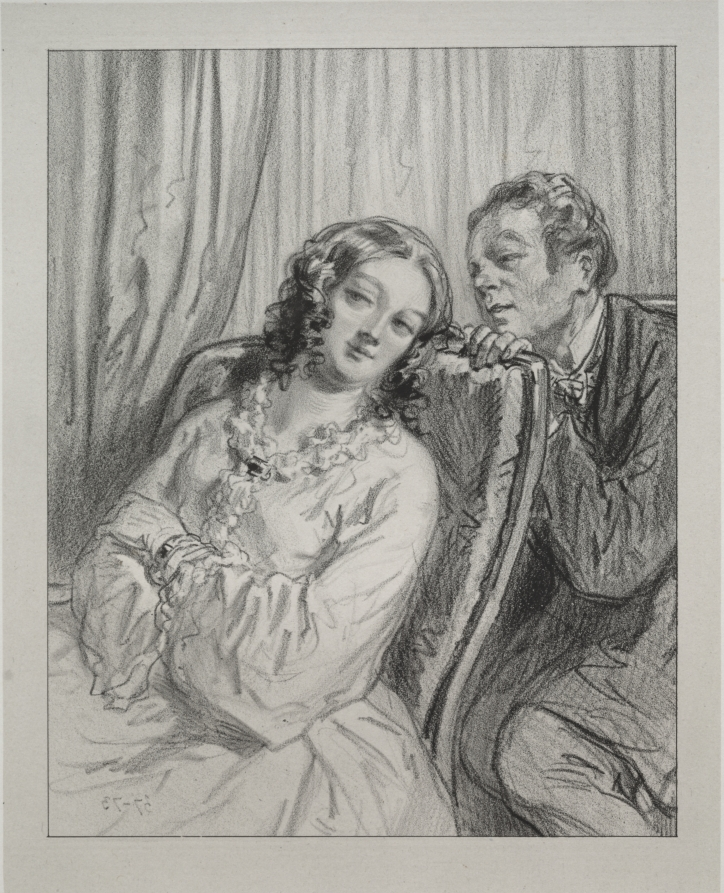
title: Masques et visages: Par-ci, par-la: M'ame Beauminet, ta majeste...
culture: France, 19th century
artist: Paul Gavarni (French, 1804–1866)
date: 1857–58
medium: lithograph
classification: Print